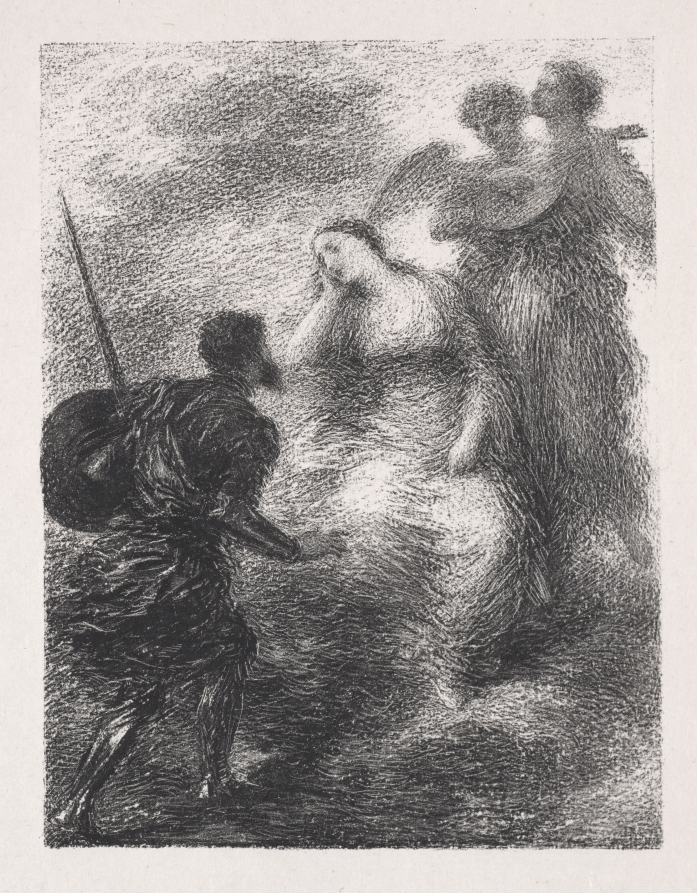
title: Vision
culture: France, 19th century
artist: Henri Fantin-Latour (French, 1836–1904)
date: 1895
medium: lithograph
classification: Print